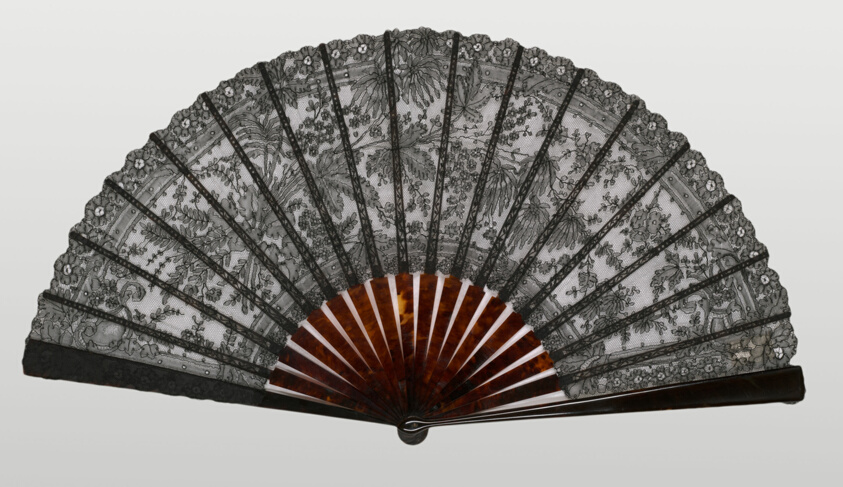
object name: Costume and Accessories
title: Fan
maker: France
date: 1870/1890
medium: tortoiseshell(?), ribs, slips, and guardsticks; silk, bobbin lace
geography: France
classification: textile; fan - lace; costume accessory - folding fan; costume accessory; costume